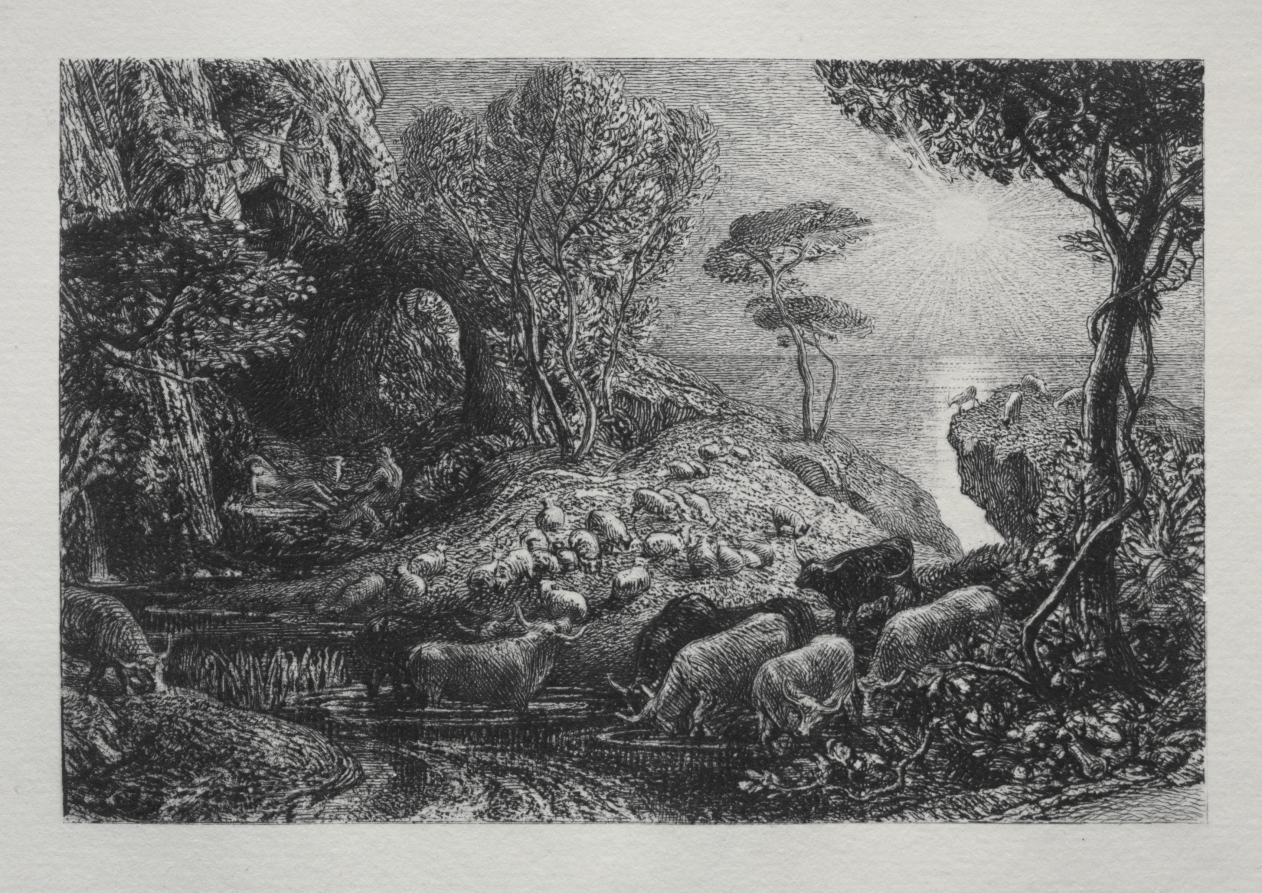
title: Moeris and Galatea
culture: England, 19th century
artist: Samuel Palmer (British, 1805–1881)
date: 1883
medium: etching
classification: Print